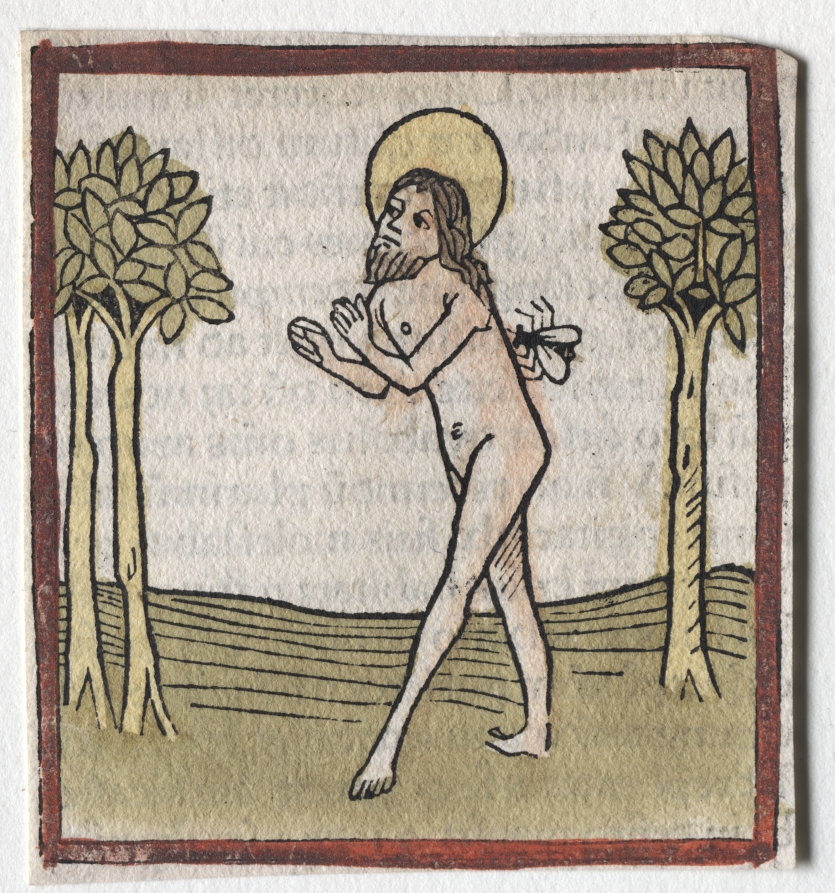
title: St. Marcarius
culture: Germany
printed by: Günther Zainer (German, d. 1478)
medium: woodcut with hand coloring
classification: Print